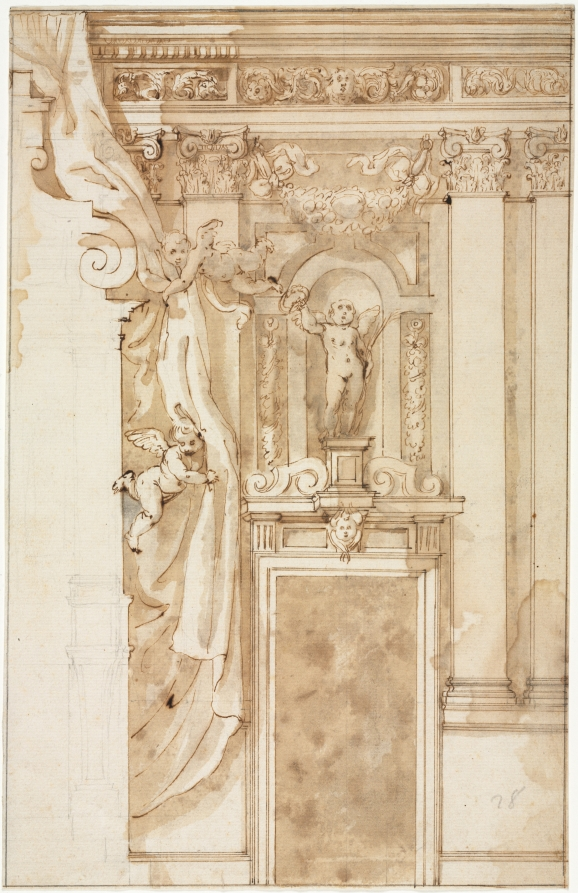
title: Elevation for Wall Decoration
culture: Italy, 16th century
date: c. 1550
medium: pen and brown ink (ruled in places) and brush and brown wash with graphite and graphite wash; framing lines in brown ink and graphite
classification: Drawing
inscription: lower right, in graphite: [2?]8 ; VERSO, lower center, in graphite: 14 ; lower right, in graphite: A. 3935 / T/A/-